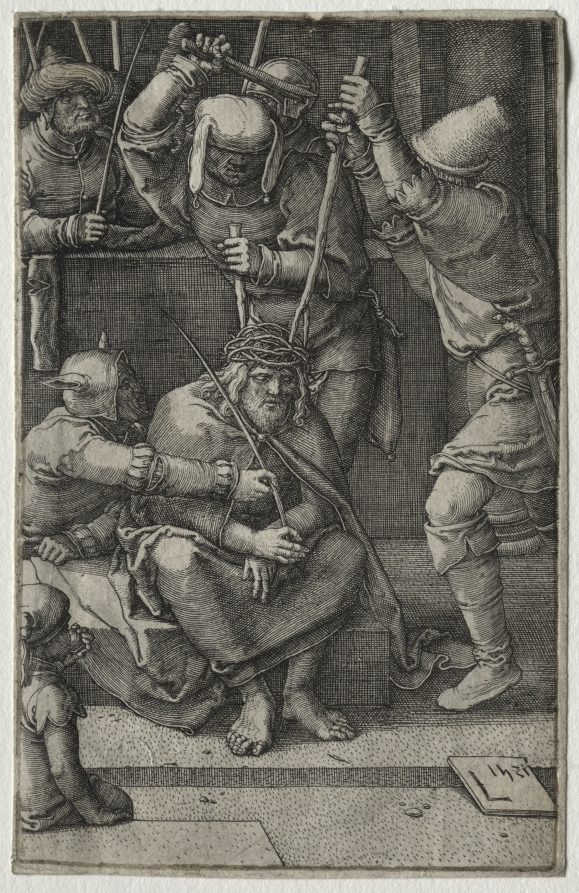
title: The Passion: Christ Crowned with Thorns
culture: Netherlands, 16th century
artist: Lucas van Leyden (Netherlandish, 1494–about 1533)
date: 1521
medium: engraving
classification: Print